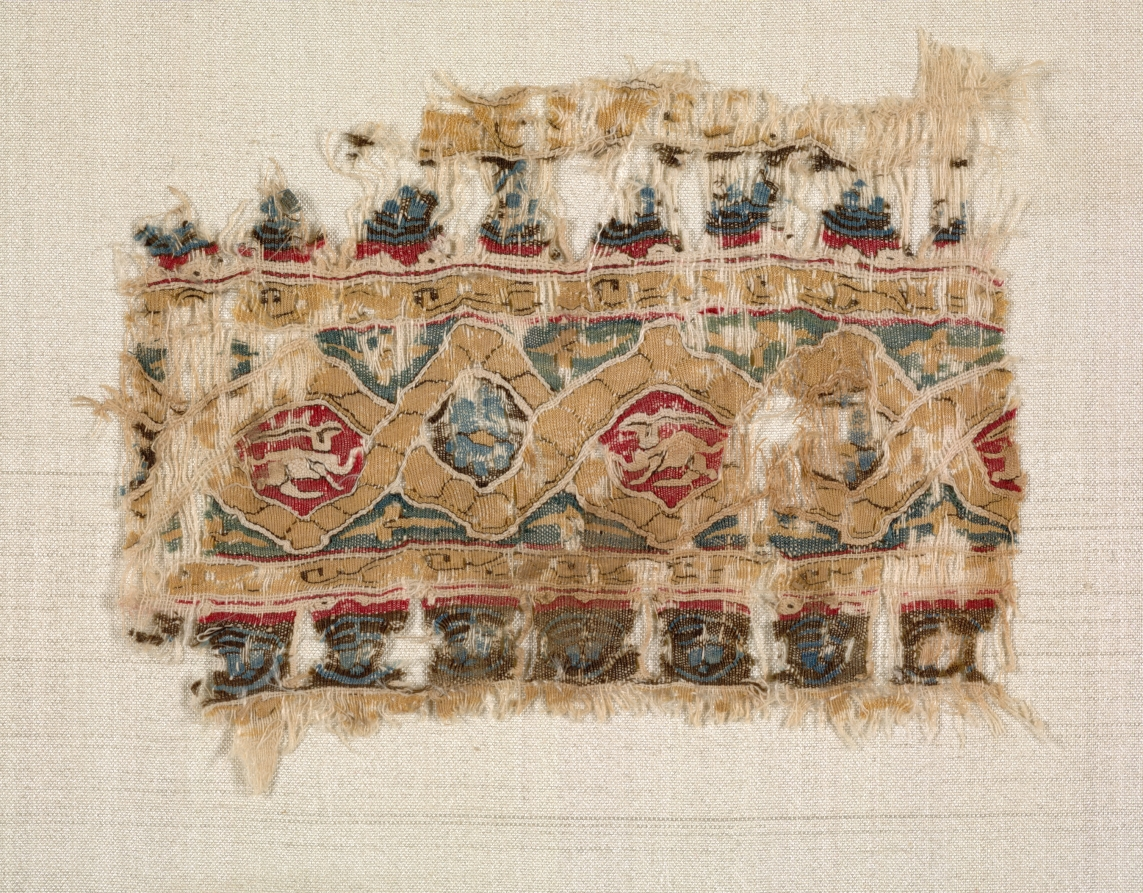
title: Fragment of a Tiraz-Style Textile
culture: Egypt, Fatimid period, Caliphate of al-Mustansir or al-Musta'li, c. AH 475-495 (A.D. 1081-1101)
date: 1081 – 1101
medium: tabby ground with inwoven tapestry ornament; linen and silk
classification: Textile